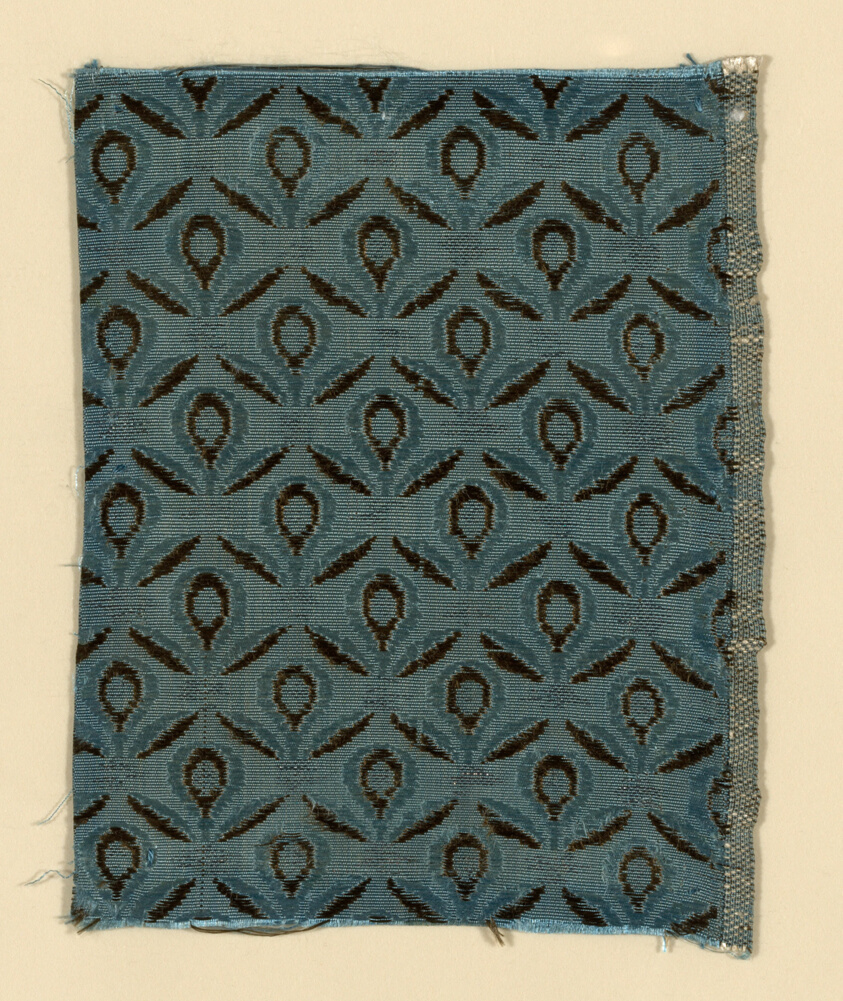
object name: Textile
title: Fragment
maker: Spain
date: 1775/1800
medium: Silk and silvered-metal strip, warp-faced weft-ribbed plain weave with supplementary patterning wefts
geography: Spain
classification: textile; weaving